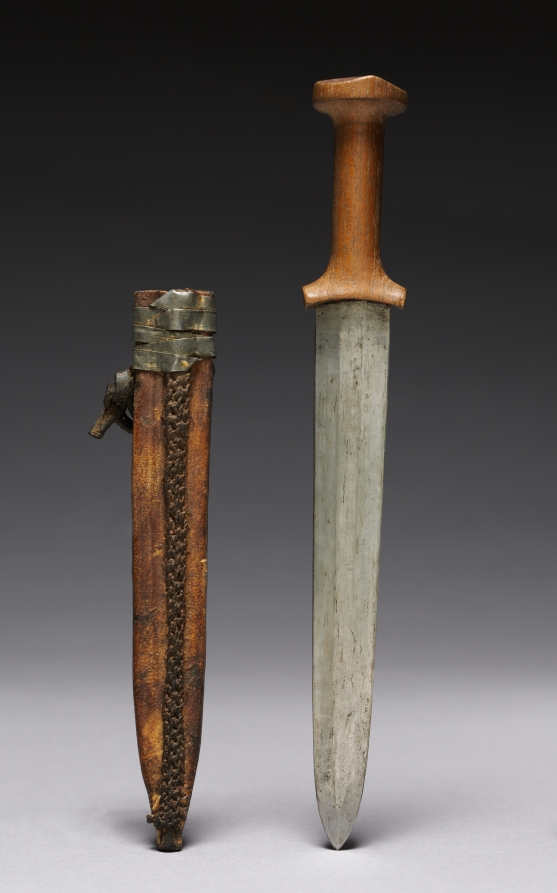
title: Knife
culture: Africa, Central Africa, Democratic Republic of the Congo, Mangbetu-style maker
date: 1900s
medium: Iron, leather, and wood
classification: Arms and Armor